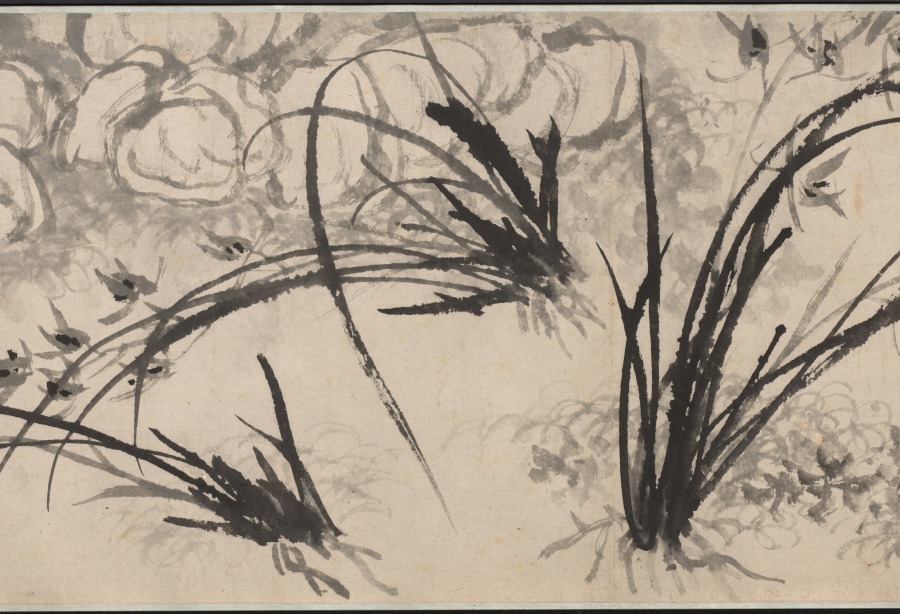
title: Rocks, Orchid, and Bamboo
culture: China, Qing dynasty (1644-1911)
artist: Shitao (Chinese, 1642–1707)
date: 1662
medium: handscroll; ink on paper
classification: Painting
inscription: Title colophon in four characters with signature and two seals on gold-flecked paper.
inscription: Artist's signature, inscription (with date of 1662), five seals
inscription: Colophon with two seals.